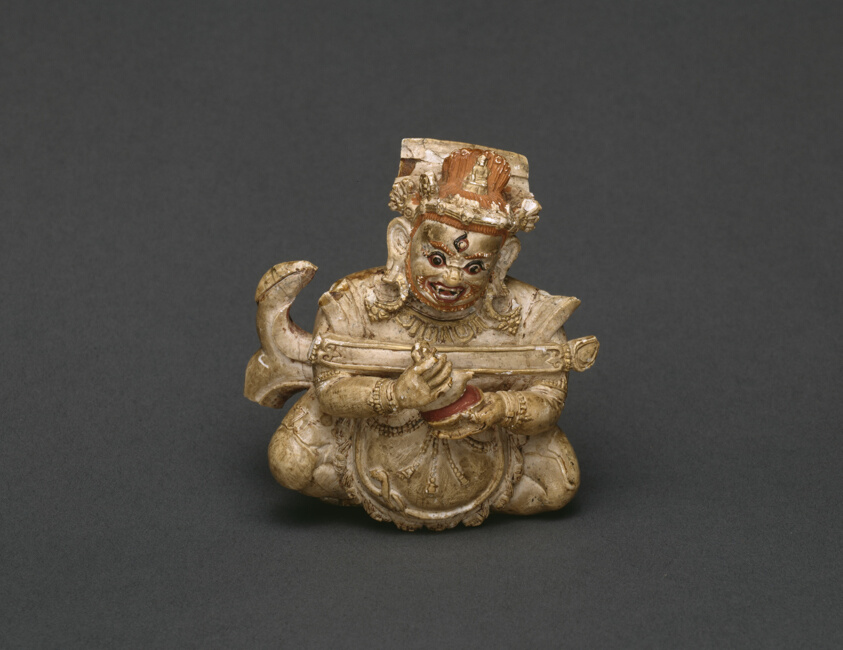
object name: Sculpture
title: Buddhist God Mahakala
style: Himalayan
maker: Tibet; Southern Tibet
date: 15th century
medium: Stone with pigment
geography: Tibet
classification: stone (unidentified); stone; sculpture; asian art